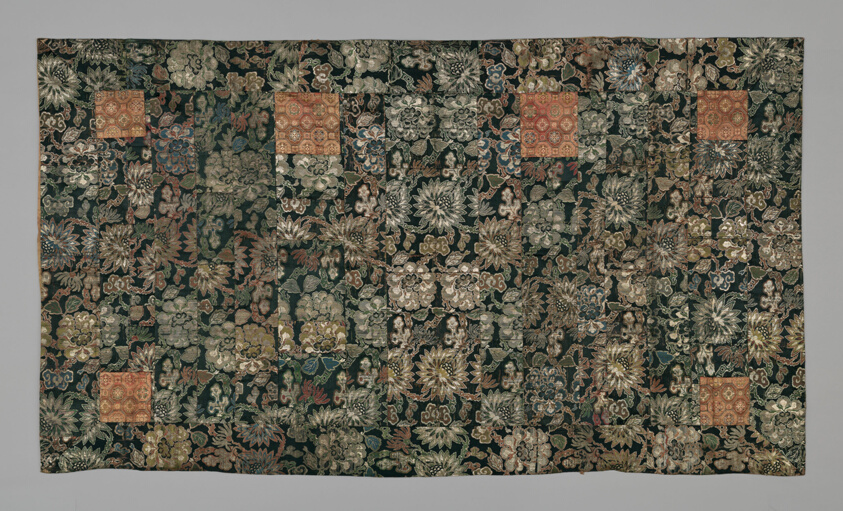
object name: Textile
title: Kesa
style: edo (japanese period), Japanism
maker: Japan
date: late Edo period (1789–1868), early 19th century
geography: Japan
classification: textile; costume; liturgical - buddhist; weaving